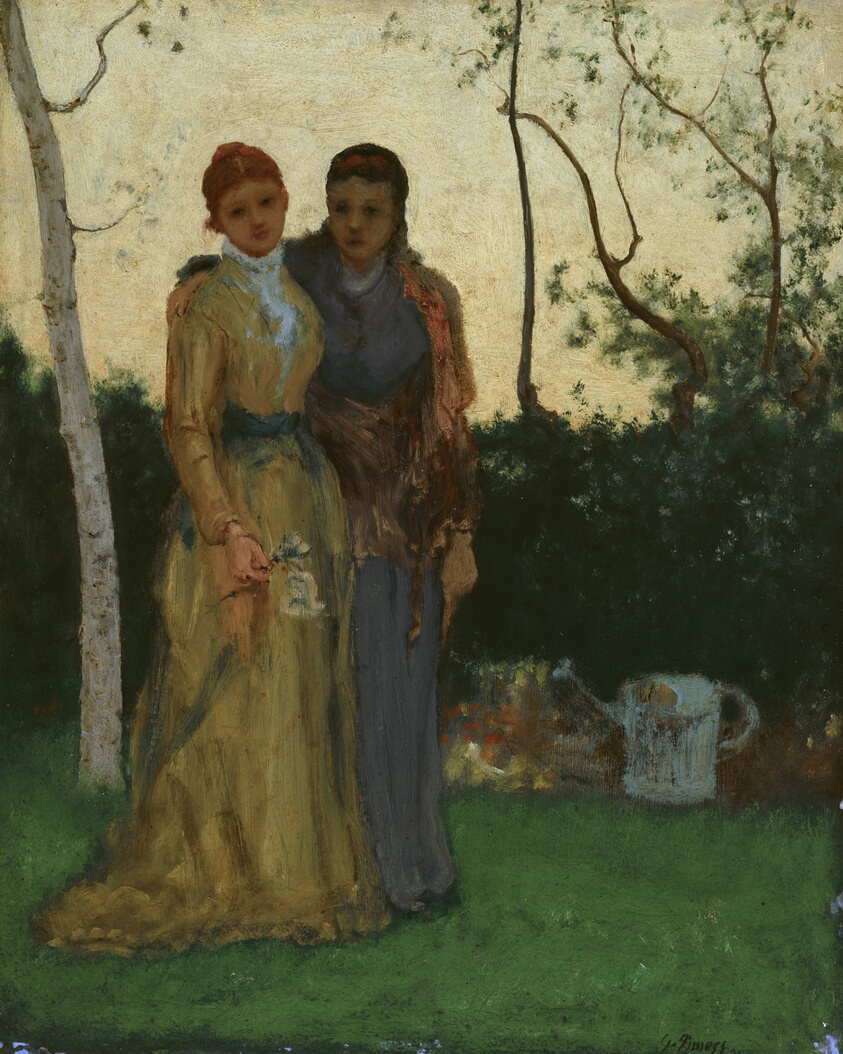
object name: Painting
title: The Sisters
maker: George Inness (American, 1825–1894)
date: 1882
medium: Oil on millboard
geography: United States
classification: painting; american arts